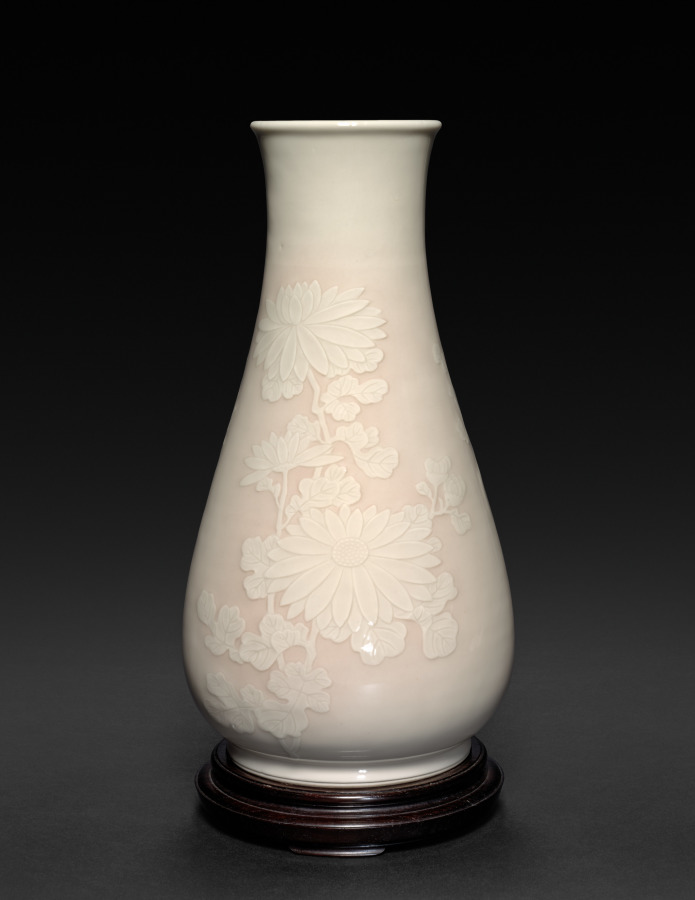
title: Flower Vase with Chrysanthemums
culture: Japan, Meiji period (1868–1912)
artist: Seifū Yohei IV (Japanese, 1872–1951)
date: 1914–46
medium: Porcelain with molded and carved design, underglaze pink, and cream glaze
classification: Ceramic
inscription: 清風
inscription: 清風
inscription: 清風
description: In creating this kanpakuji (or "bright-jewel white porcelain") vase, Yohei IV has applied his father’s signature creamy translucent glaze in combination with underglaze pink gradation surrounding motifs in low relief over an ivory clay body. This method was used to achieve the creamy white of the stalks, leaves, buds, and flowers of the elaborate design of chrysanthemum flowers in diverse stages of bloom.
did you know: The ivory and pink vase by Yohei IV show his father’s “bright-jewel white porcelain” technique.